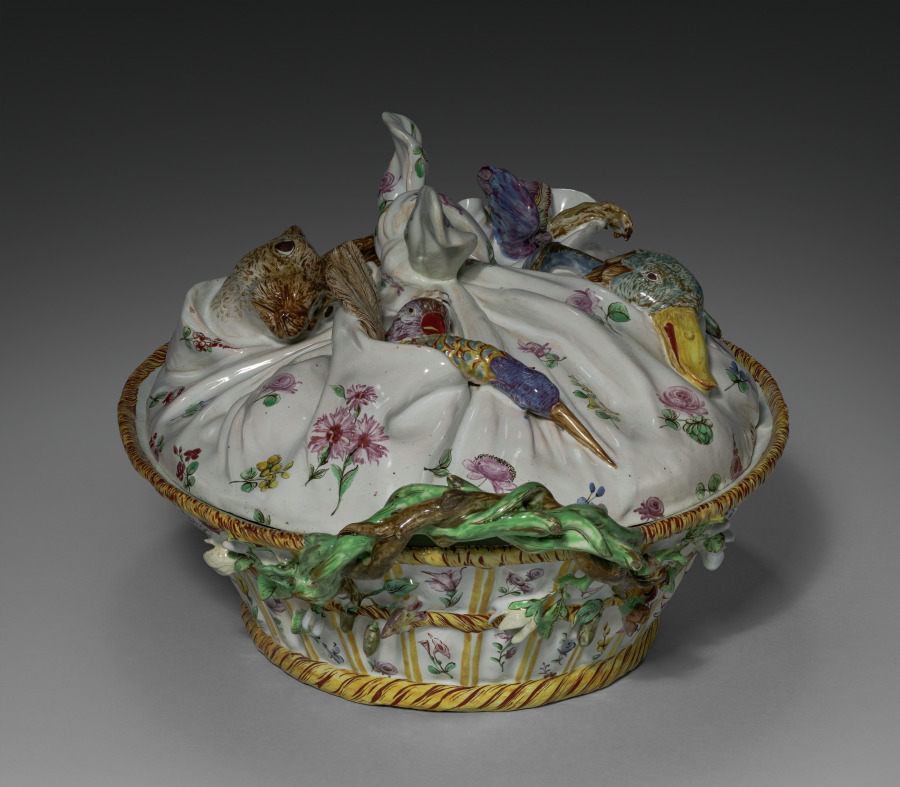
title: Covered Tureen in the Form of a Basket of Game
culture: France, 18th century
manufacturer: Sceaux Factory (French, active 1748–66)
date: c. 1755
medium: Tin- glazed earthenware (faience) wth enamel decoration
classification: Ceramic